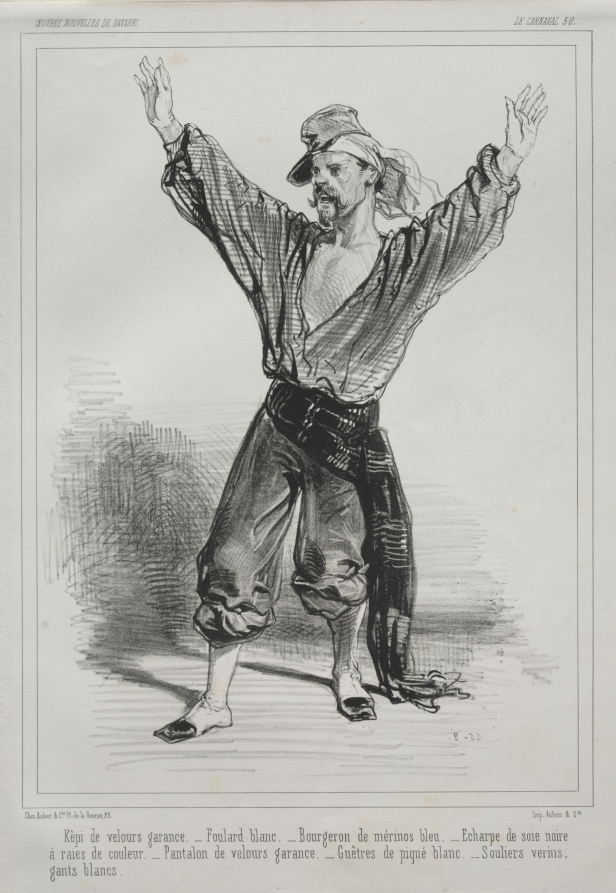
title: Carnaval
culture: France, 19th century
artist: Paul Gavarni (French, 1804–1866)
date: c. 1841–47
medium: lithograph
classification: Print